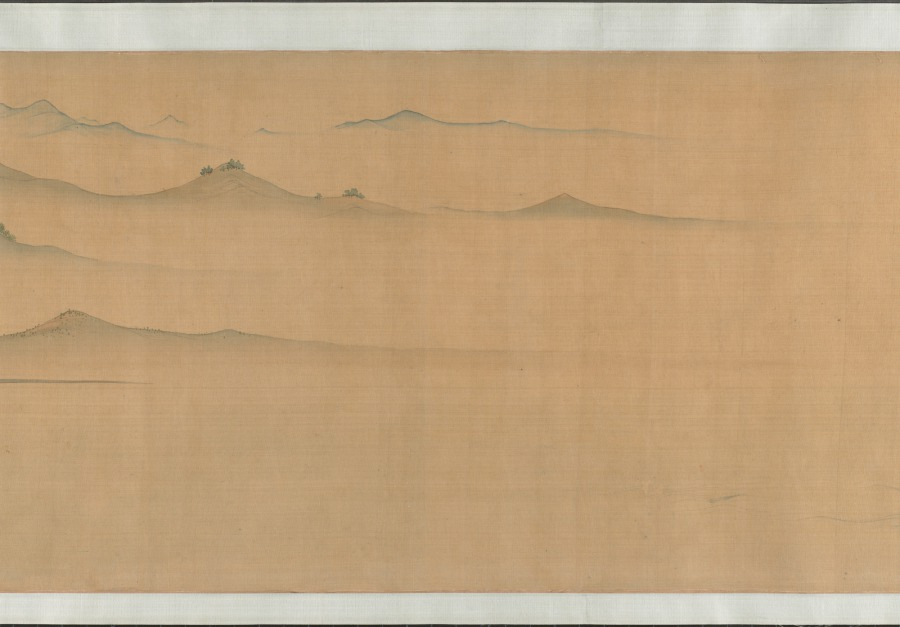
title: Garden for Solitary Enjoyment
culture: China, Ming dynasty (1368–1644)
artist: Qiu Ying (Chinese, 1494–1552)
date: 1515–52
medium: Handscroll; ink and light color on silk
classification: Painting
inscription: Accompanying text of an essay together with seven poems of Sima Guang (1019–1086) and one poem of Su Shi (1037–1101) written by Wen Zhengming (1470–1559) in 1558.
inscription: 2 colophons and 82 seals: 4 seals of Wen Zhengming 文徵明 (1470–1559); 59 seals of Xiang Yuanbian 項元汴 (1525–1590); 1 colophon, dated 1644, and 7 seals of Xiang Yukui 項禹揆 (c. late 1500s–1659); 1 colophon, dated 1880, and 2 seals of Weng Tonghe 翁同龢 (1830–1904); 2 seals of Ch'eng Chen-i (19th c.); 1 seal of Han Ch'ung (19th c.); 4 seals of Wan-go H. C. Weng 翁萬戈 (1918–2020); 3 seals unidentified.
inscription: Colophon by Xiang Yukui 項禹揆 (c. late 1500s–1659): The painting of The Garden for Self-enjoyment on the right by Shih-chou, Mr. Qiu [Qiu Ying] is in the style of Li Lung-mien. Its mood is peaceful, as if meeting the ancient gentlemen face to face among the brushes and silk; it lifts one above the sordid bustle of life. Formerly, my late father handed me this scroll which had only the painting without the written essay. I considered asking a good calligrapher to write the essay to add to it but was afraid that the quality of the writing would not match the painting. Several years later, I saw at a friend's house this essay and poems (of Ssu-ma Kuang] written by Hengshan [Wen Zhengming], once owned by my grandfather; so I spared no expense to obtain it. I rejoiced at this and said: "The divine swords are finally united. How things are pre-destined!" Now my friend Chang Kung-chao's technique for mounting [painting and calligraphy] is excellent. Therefore by daring to take them out and join them together, I can preserve this beautiful story of singular reunion. Xiang Yukui recorded at Hai-yeh-t'ang [hall] two days before New Year's Eve in the jiasheng year of the Chongzhen era [1644]. trans. LYSL/HK/WKH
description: Garden of Solitary Enjoyment refers to a site built in 1073 by the statesman Sima Guang (1019–1086) after he had retired to Luoyang, Henan province. Every spring, visitors would flock to his garden. Each of its seven structures references a historic figure. Sima wrote: I channel streams [like Du Mu], to water flowers [like Bai Juyi], or trim bamboo [like Wang Huizhi]. . . . I know of no joy between heaven and earth that could take its place. Qiu Ying’s painting, created after an 11th-century version of the same theme, must have appealed to garden owners of the Ming dynasty, since it became the template for numerous Suzhou workshop copies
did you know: Sima Guang completed his monumental survey of Chinese history, Zizhi tongjian, in the garden depicted in this painting.